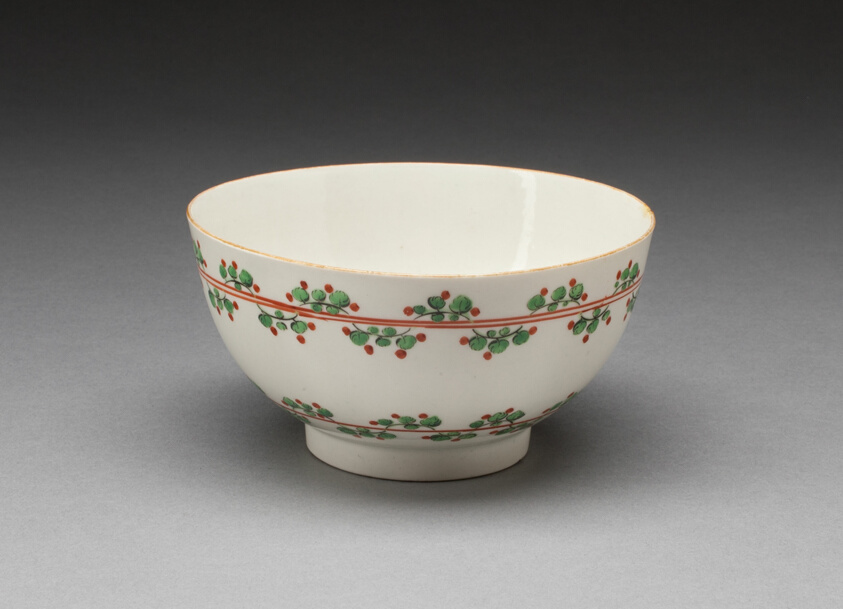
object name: Ceramics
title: Slop Bowl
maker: Worcester Porcelain Factory (Warmstry House Period, 1751–1783); Worcester, England, founded 1751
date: c. 1770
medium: Soft-paste porcelain with polychrome enamels and gilding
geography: Worcester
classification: slop bowl; teaware; tableware; ceramics; porcelain; european decorative arts